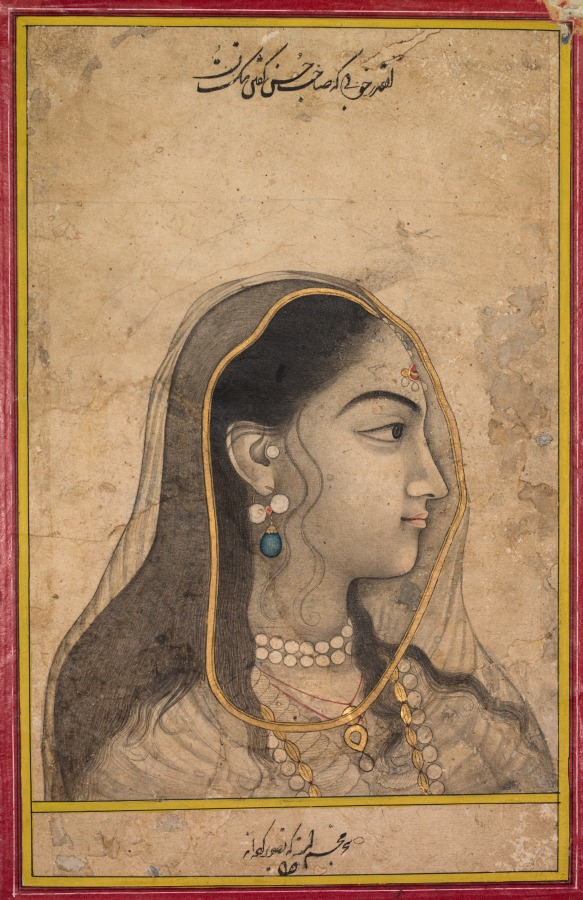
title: Head of a Beauty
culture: India, Mughal school, 18th century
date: c. 1750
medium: Gum tempera, ink, and gold on paper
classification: Painting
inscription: recto, upper center, in Persian: So exquisite that to call you beautiful would be a travesty of the word; it is magic personified that has been exhibited in this painting. Bottom center in Persian: Picture of a beauty.